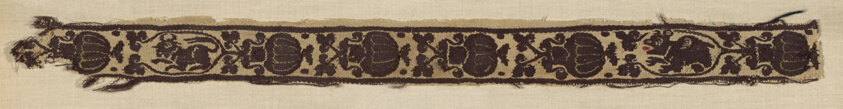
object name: Textile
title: Border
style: greco-roman (egyptian)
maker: Egypt, probably Akhmin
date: Greco–Roman period (30 B.C.– 641 A.D.), 4th/5th century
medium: Wool and linen, tapestry weave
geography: Egypt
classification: textile; weaving